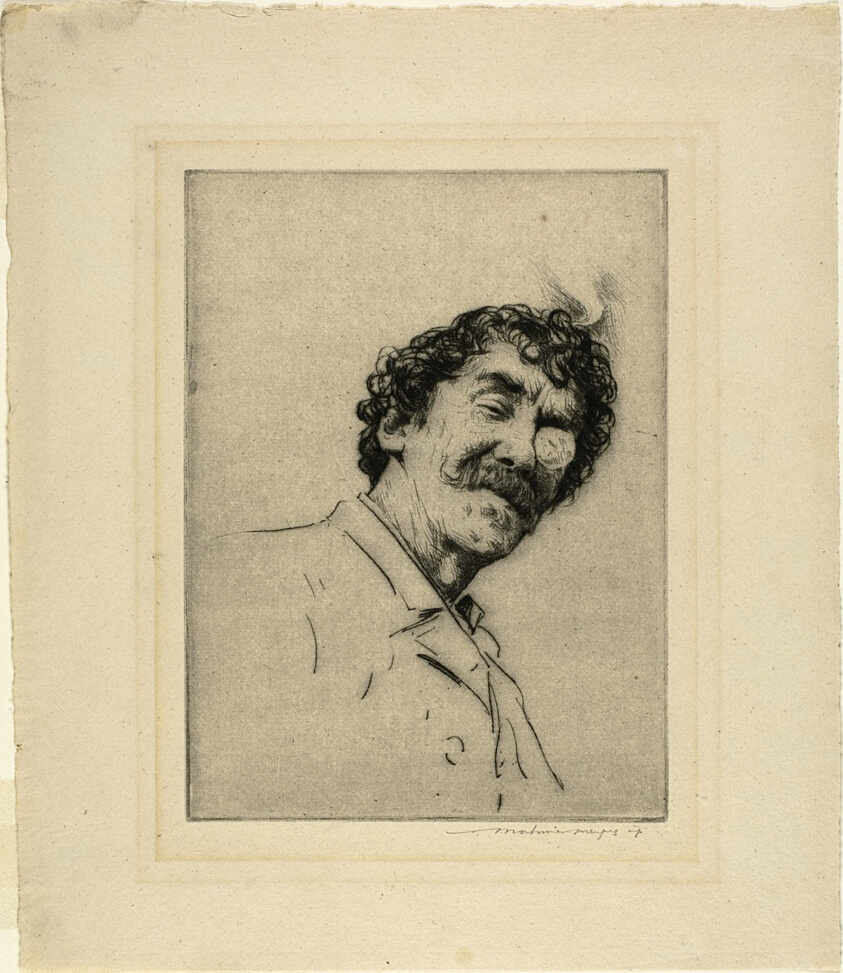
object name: Print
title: Whistler no. 2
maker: Mortimer Luddington Menpes (Australian, worked in England, 1855-1938)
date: 1902/03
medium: Drypoint in black with plate tone on cream laid paper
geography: Australia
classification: etching; print; prints and drawing